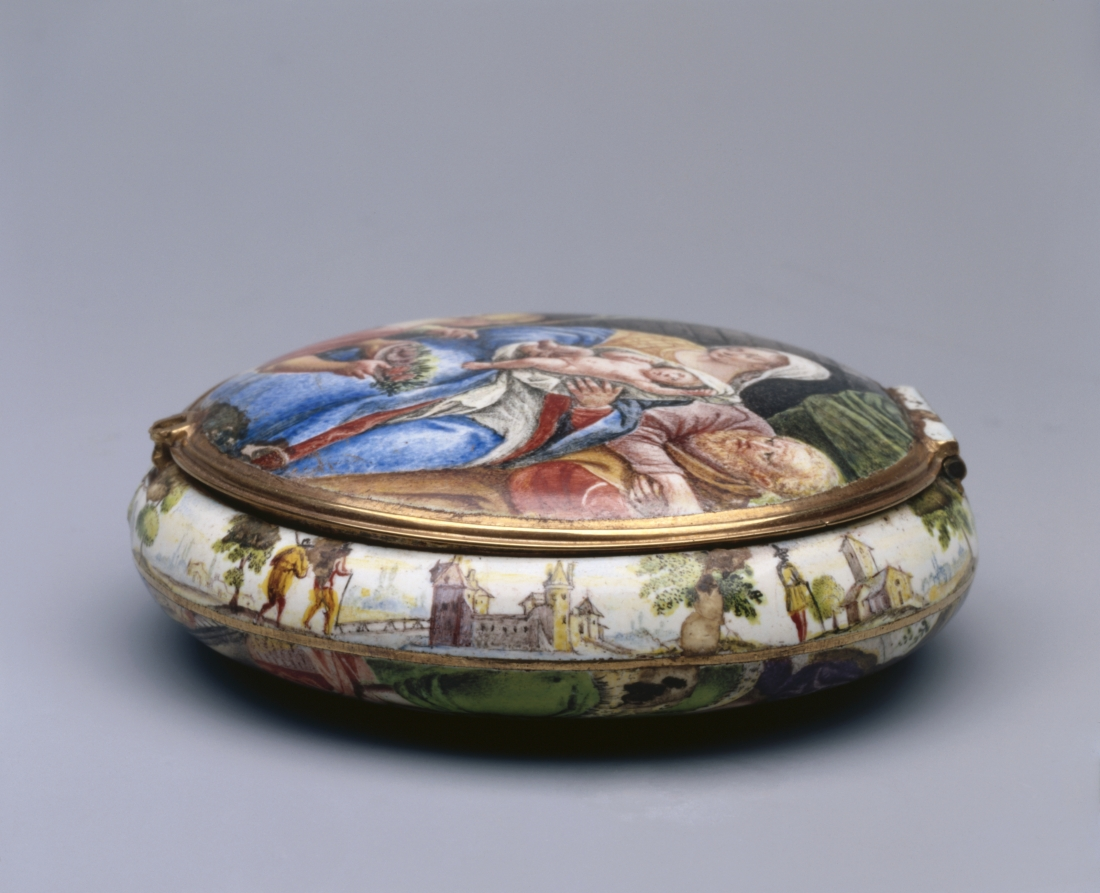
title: Watchcase (Boîtier de montre)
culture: France, 17th century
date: c. 1640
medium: gold and enamel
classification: Jewelry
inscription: [engraved on the rim]: "B8"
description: In the 1630s, the practice of painting with enamel on metal became a means for French miniature painters to achieve a more richly colored, durable product. Previously miniatures were painted with watercolor on vellum, a material made from animal skin. This case would have originally held a watch, but was later transformed into a simple box through the removal of the watch mechanism and ring. This watch case is richly painted inside and out with miniatures modeled after well-known religiously allegorical works.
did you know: Inspiration for the box’s miniatures was drawn from works by Peter Paul Rubens’ The Holy Family with Saints John the Baptist and Elizabeth (1615) (back panel) and Nicolas Cochin (interior base).